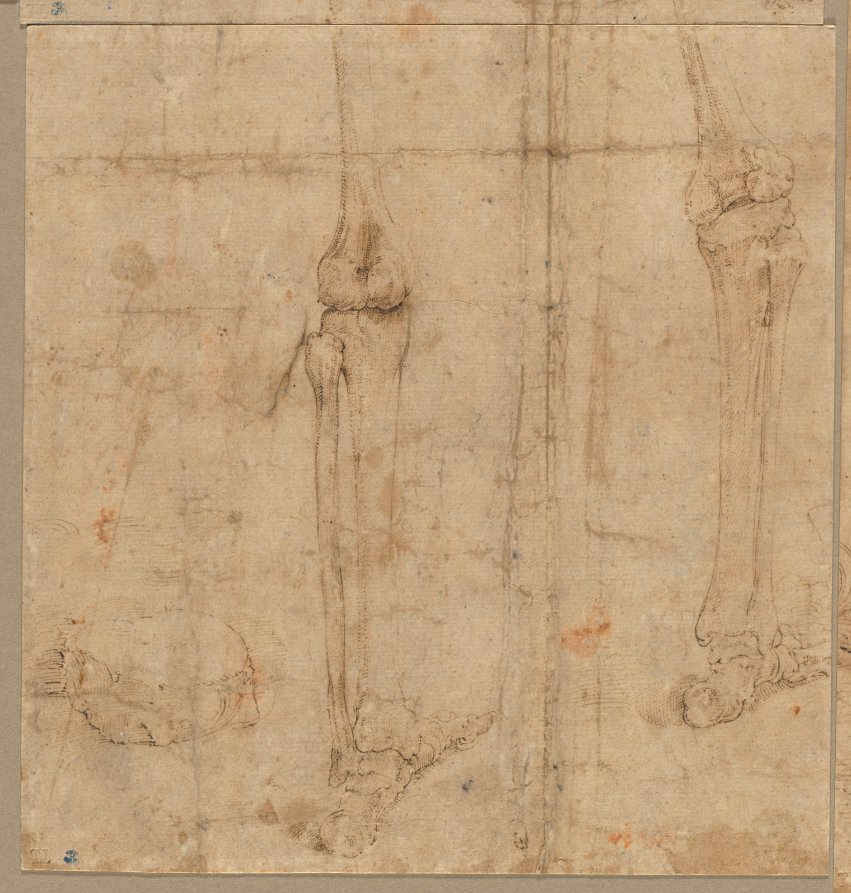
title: Lower Half of Skeleton from the Back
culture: Italy, 16th century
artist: Battista Franco (Italian, c. 1510–1561)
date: early 1540s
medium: pen and brown ink with incised lines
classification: Drawing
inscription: VERSO OF SECONDARY SUPPORT, lower left, in graphite: 3.